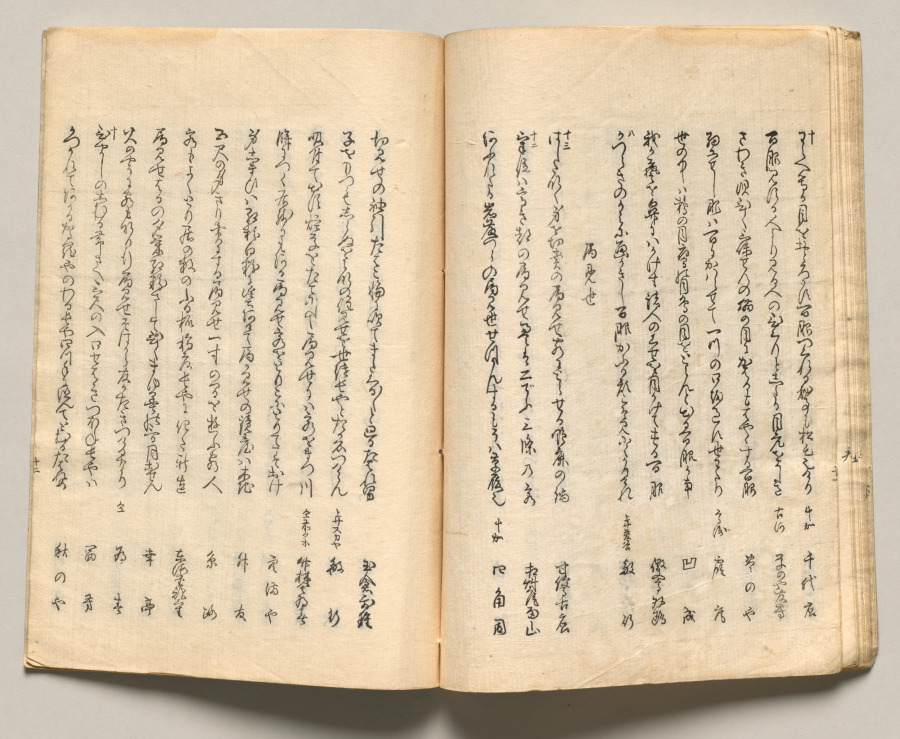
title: Spread Nineteen from Volume Five of People of Japan in Light Verse (Kyōka)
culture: Japan, Edo period (1615–1868)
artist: Utagawa Hiroshige (Japanese, 1797–1858)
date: 1857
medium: Woodblock-printed book; ink and color on paper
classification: Bound Volume